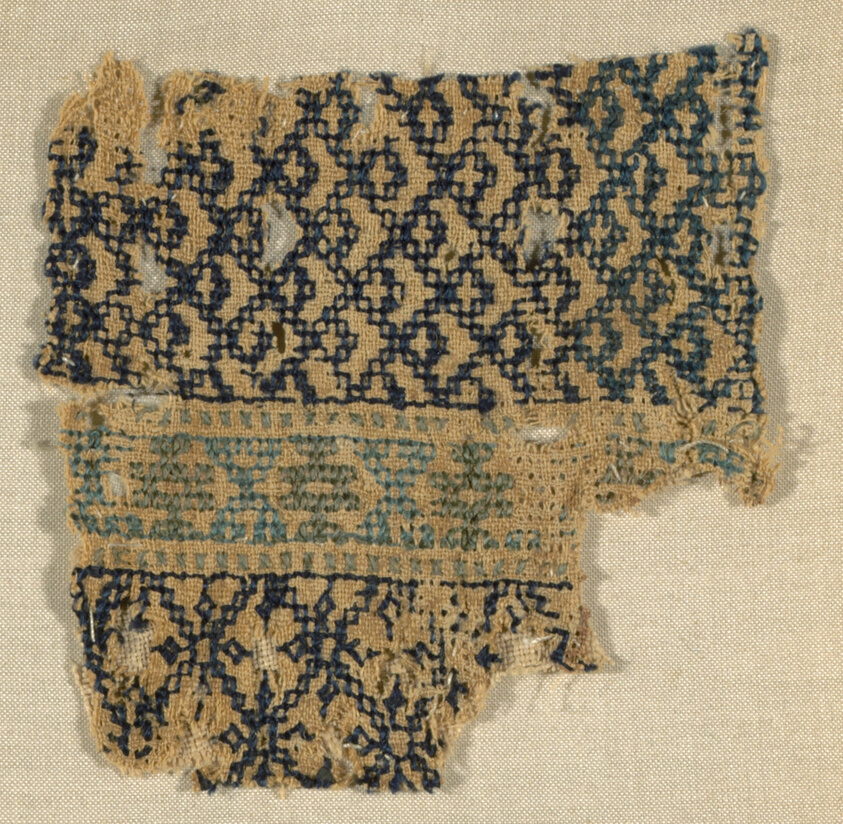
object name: Textile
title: Fragment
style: mamluk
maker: Egypt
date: Mamluk period (1250– 1517), 13th/14th century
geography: Egypt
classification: textile; needlework (visual works)